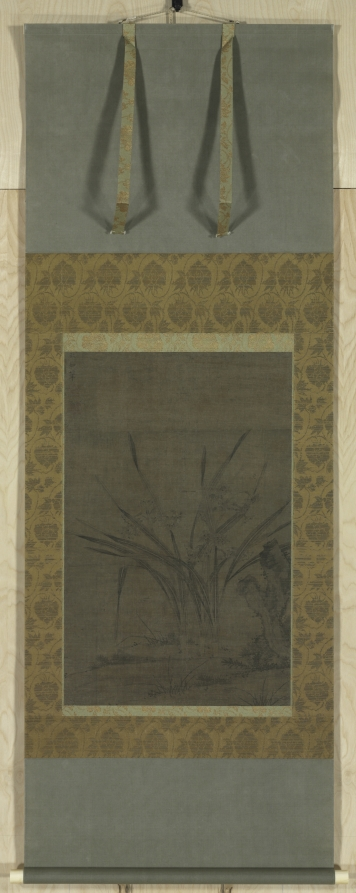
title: Narcissus and Rocks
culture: China, Ming dynasty (1368–1644)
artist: Lu Tianru (Chinese, first half of 1400s)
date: 1368–1644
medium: hanging scroll, ink on silk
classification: Painting